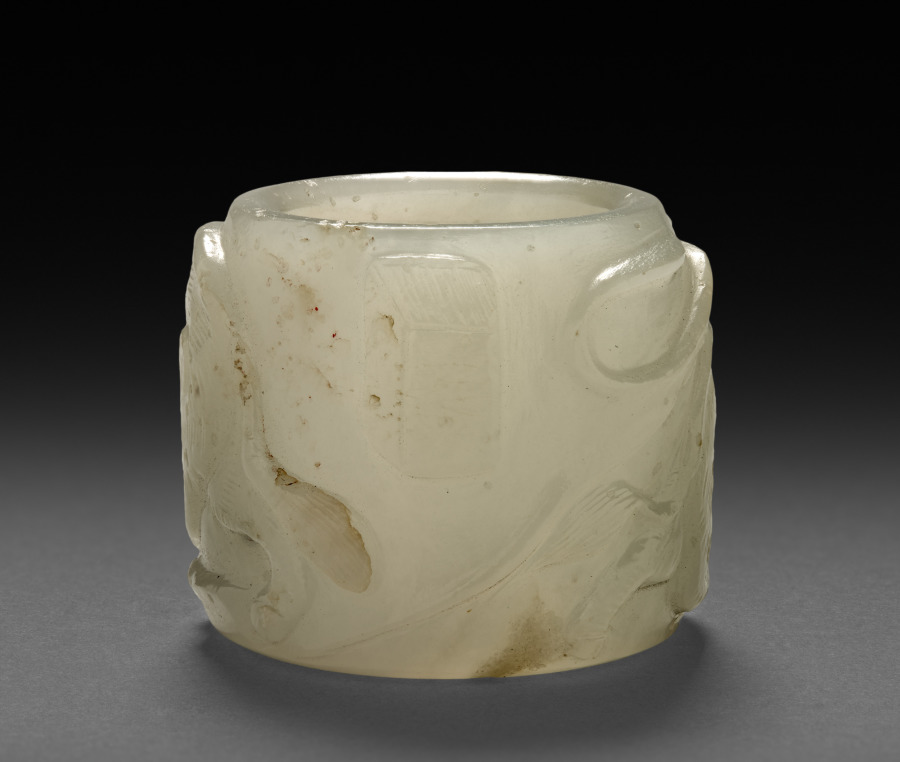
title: Thumb Ring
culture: China, Qing dynasty (1644-1911) or Republican period (1912-49)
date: 1800s–mid-1900s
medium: white jade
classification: Jewelry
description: Jade rings were worn by men on the thumb of the right hand to assist with holding and pulling the string of the archer’s bow. However, thumb rings were also fashionable accessories for civil officials in the late Qing dynasty.